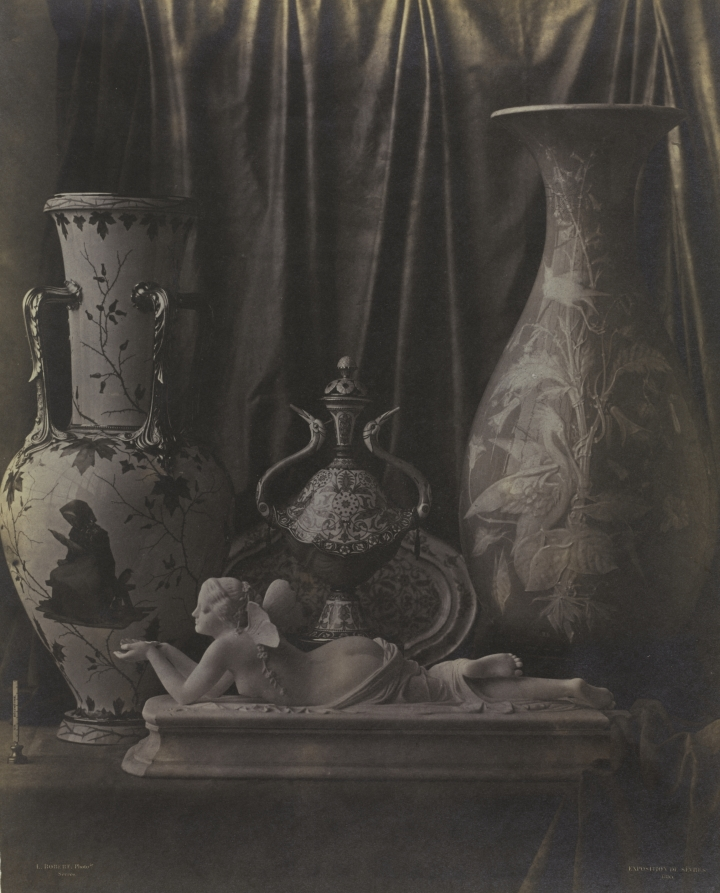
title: Still Life with Porcelain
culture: France, 19th century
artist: Louis-Rémy Robert (French, 1811–1882)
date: c. 1855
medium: albumen print from wet collodion negative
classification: Photograph